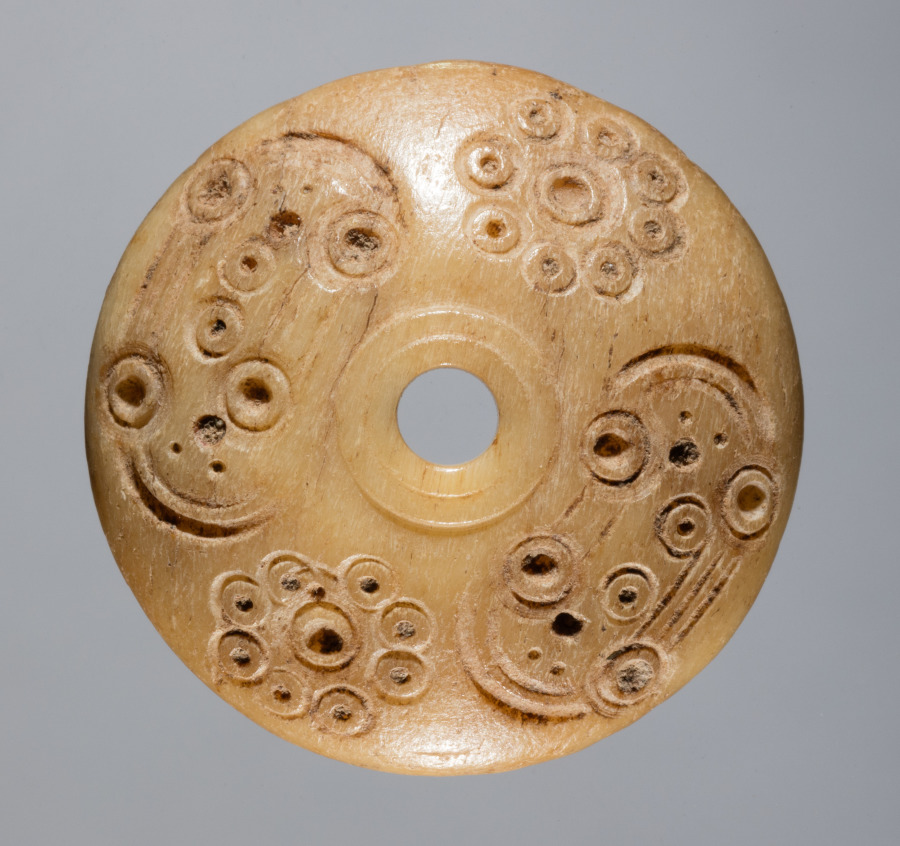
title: Spindle Whorl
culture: Iran, early Islamic period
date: 700s - 900s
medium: bone, incised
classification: Spindle Whorl